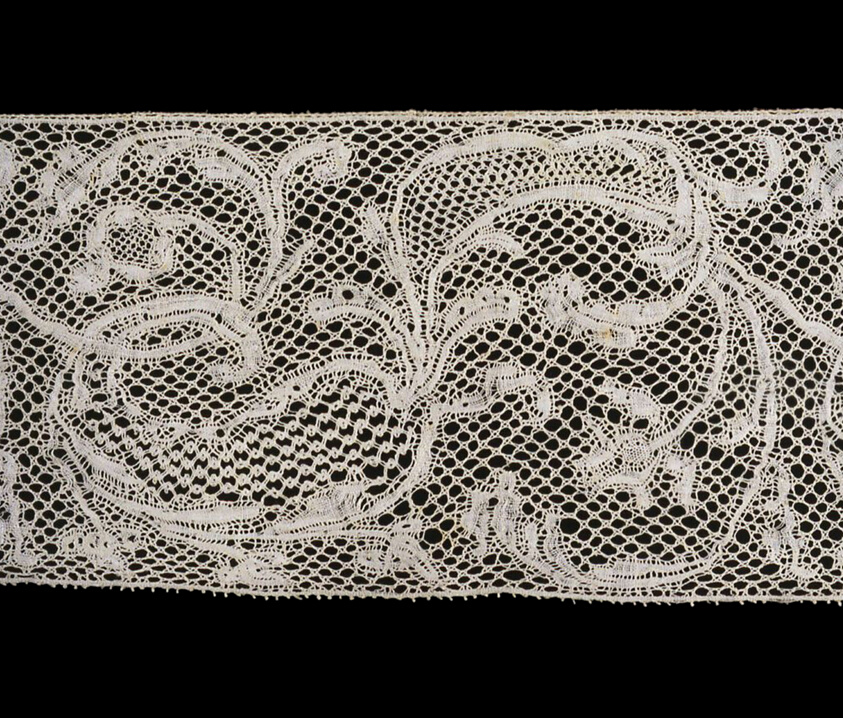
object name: Textile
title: Two Borders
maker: Northern Europe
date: 1725/1800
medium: Linen, bobbin straight lace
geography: Europe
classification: textile; lace - bobbin; lace